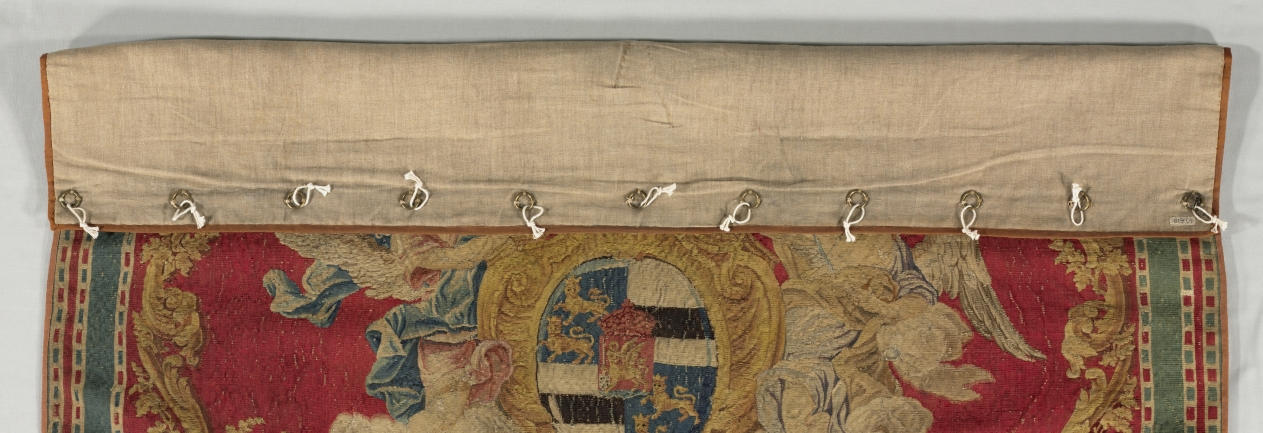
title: Heraldic Tapestry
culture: France, 18th century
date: 1700s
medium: tapestry weave: silk and wool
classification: Tapestry